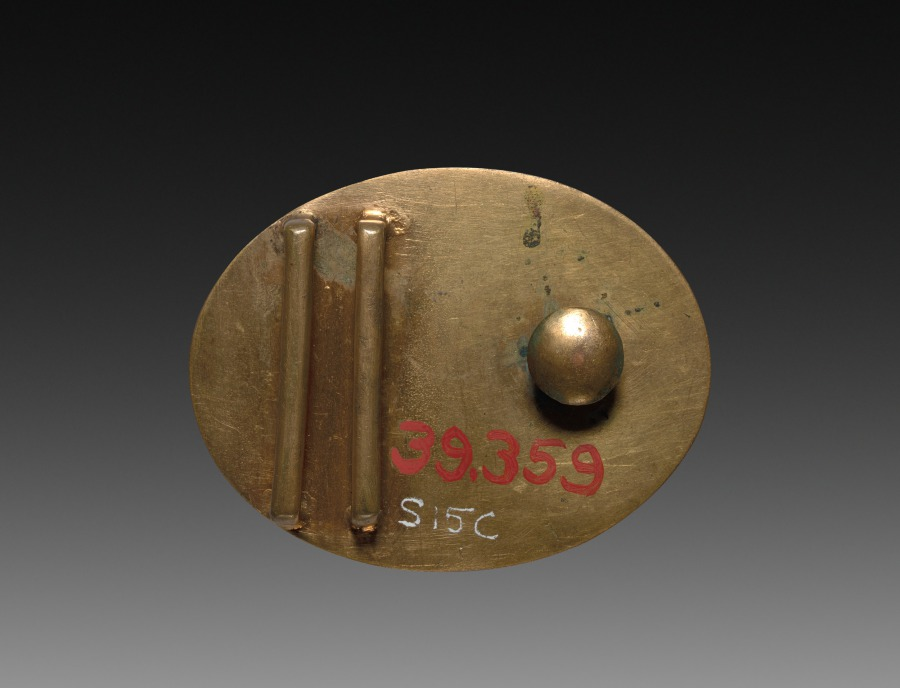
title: Belt Buckle with Flowers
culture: Japan, Meiji period (1868–1912) or Taishō period (1912–26)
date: early 1900s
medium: cloisonne enamel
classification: Enamel